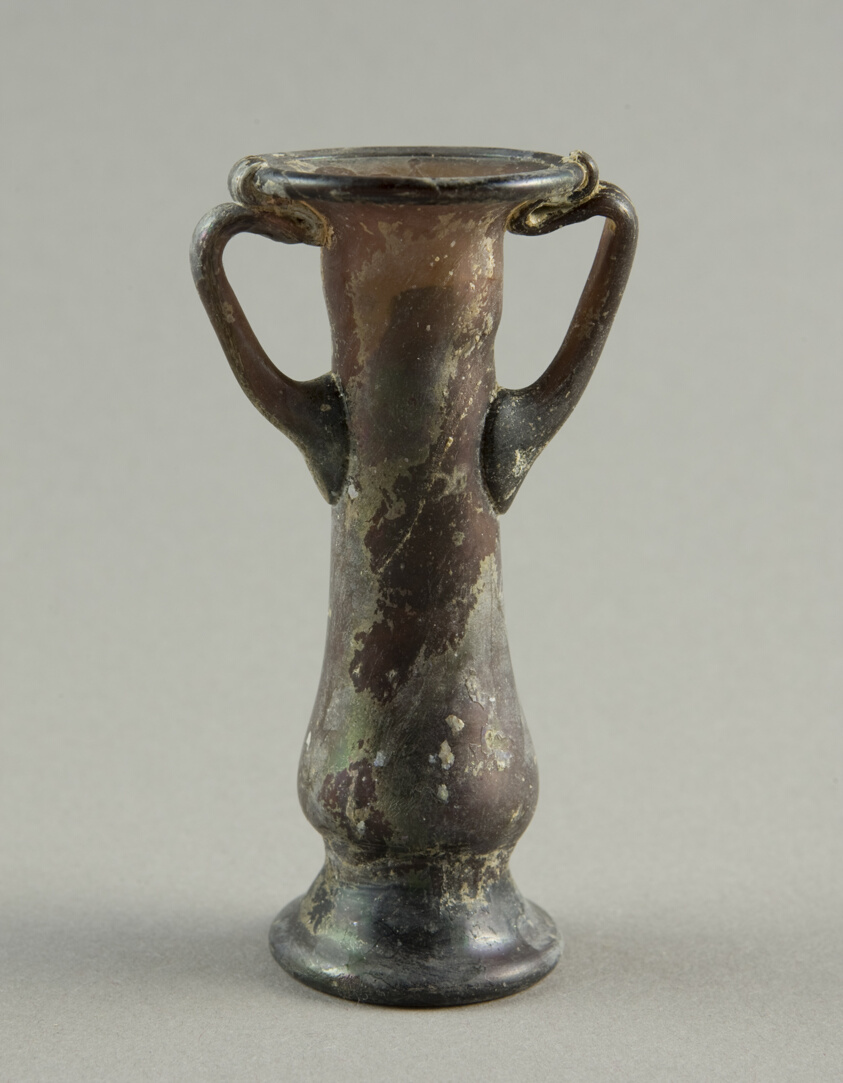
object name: Vessel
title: Bottle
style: syrian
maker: Roman; Levant or Syria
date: 4th-5th century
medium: Glass, blown technique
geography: Syria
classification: bottle; glass; vessel; ancient art